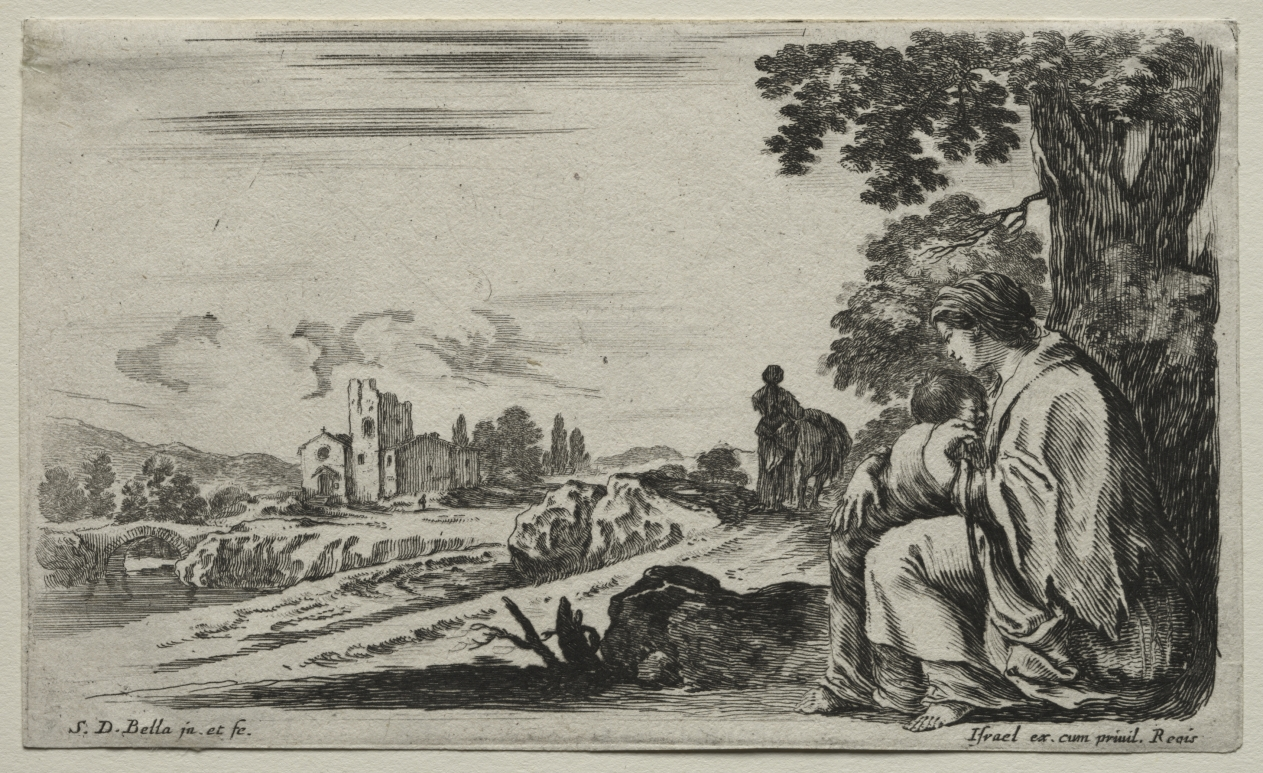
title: Various Figures and Landscapes: A Poor Nurse Seated under a Tree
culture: Italy, 17th century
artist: Stefano Della Bella (Italian, 1610–1664)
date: 1649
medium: etching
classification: Print